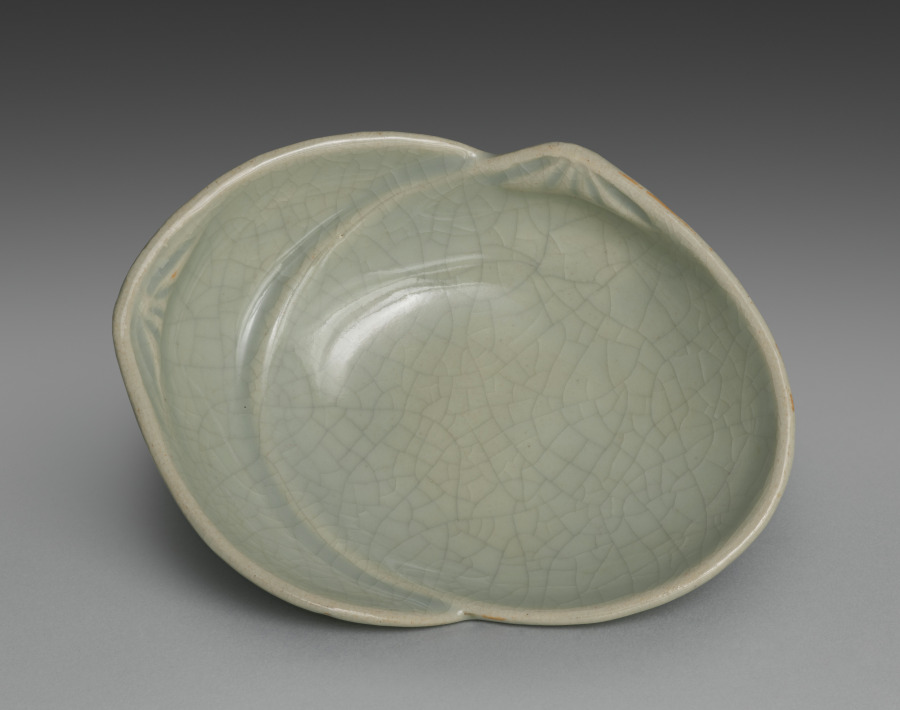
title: Dish from Dishes with Matching Shells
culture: Japan, Meiji period (1868–1912)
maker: Seifū Yohei III (Japanese, 1851–1914)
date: 1893–1914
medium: One of a pair of dishes; porcelain with celadon glaze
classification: Ceramic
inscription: 清風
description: Yohei III’s main output for his sophisticated clientele was in the form of tea sets and dining sets. He created a range of dishes in green glazes. He often produced in pairs, sets of five, or sets of ten. This pair of shell dishes have a box lid interior attestation by Yohei IV that the dishes were made by Yohei III with a cracked-ice (hyōretsu) pattern in the glaze, omitting reference to any glaze coloration.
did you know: These shell-shaped dishes are of the saucer type, suitable for dipping sauces.